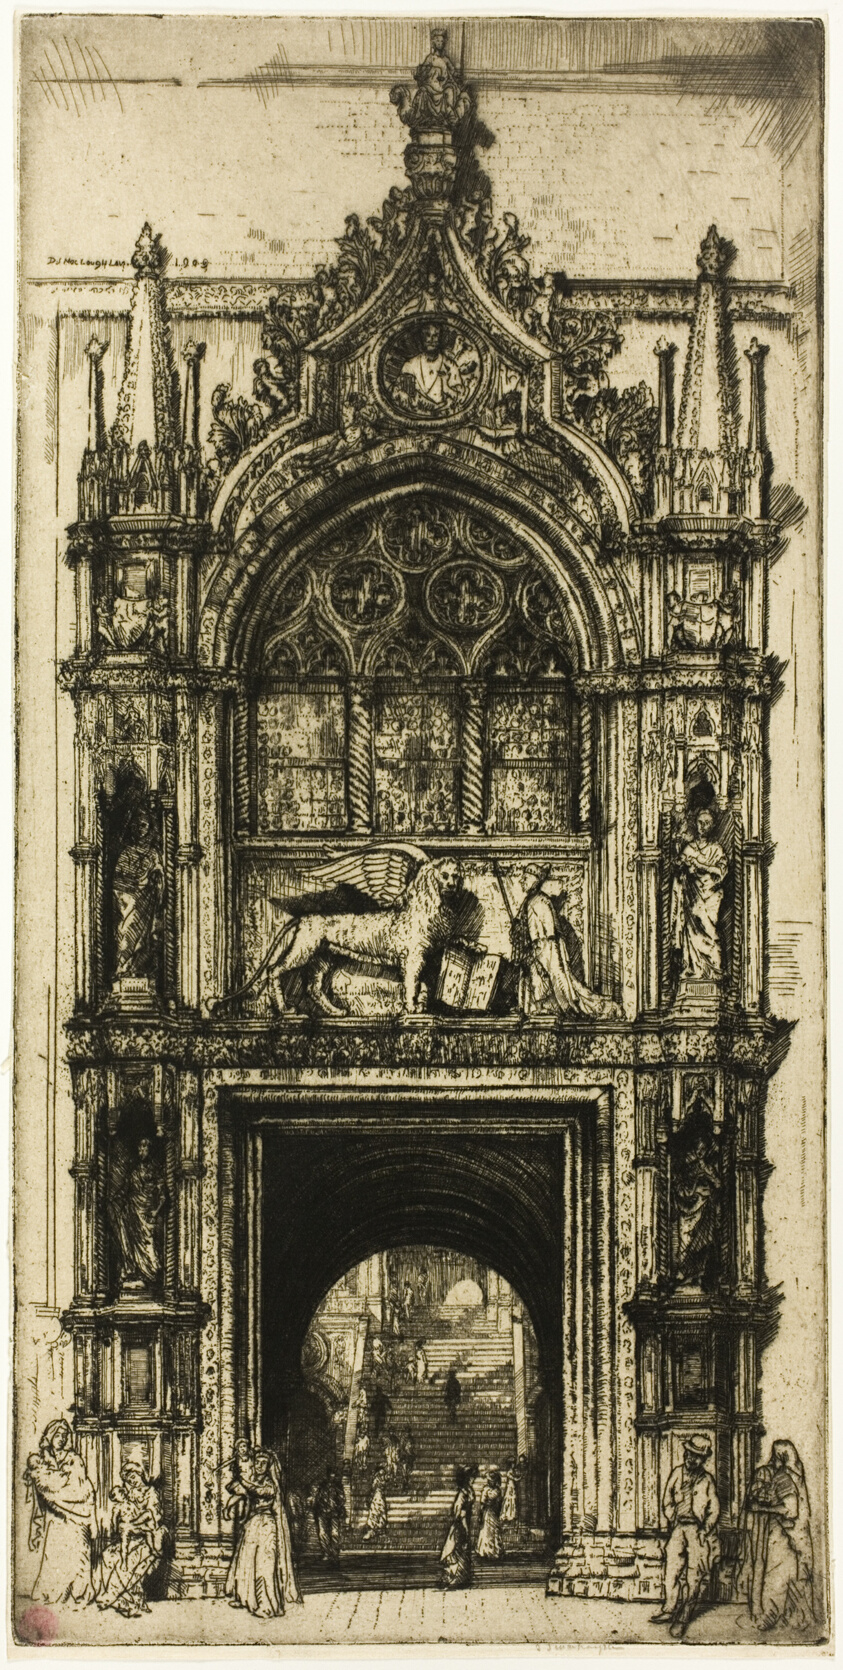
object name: Print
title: Doorway of the Doges', Venice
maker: Donald Shaw MacLaughlan (American, born Canada, 1876-1938)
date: 1909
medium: Etching in black on cream laid paper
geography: United States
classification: etching; print; prints and drawing